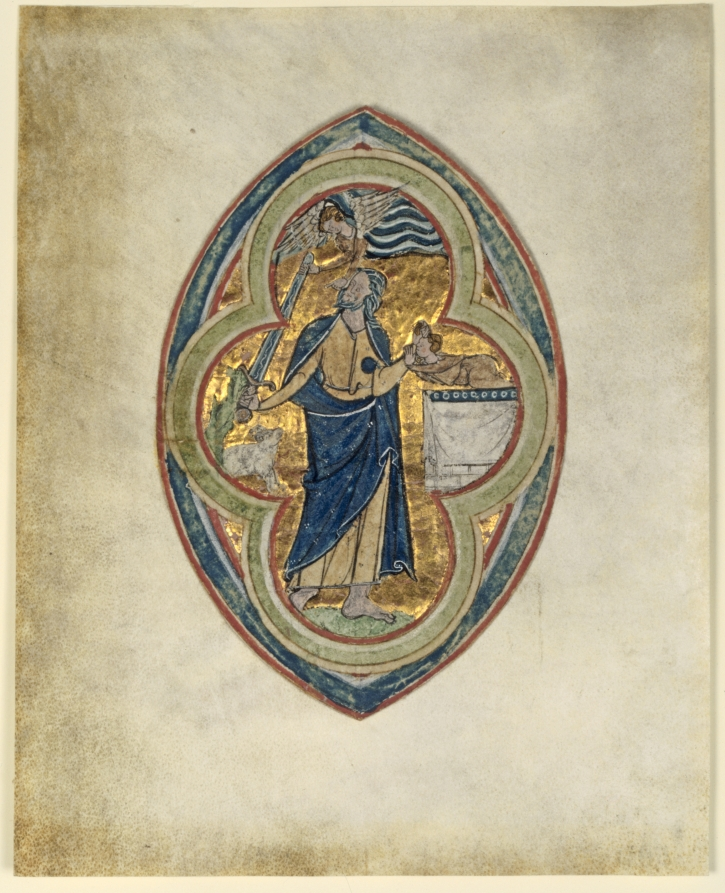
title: Miniature Excised from a Compendium in historiae genealogia Christi by Peter Poitiers: The Sacrifice of Isaac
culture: England, London, 13th century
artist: workshop of William de Brailes (English, active c. 1230)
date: 1200–1250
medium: ink, tempera, and gold on vellum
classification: Manuscript